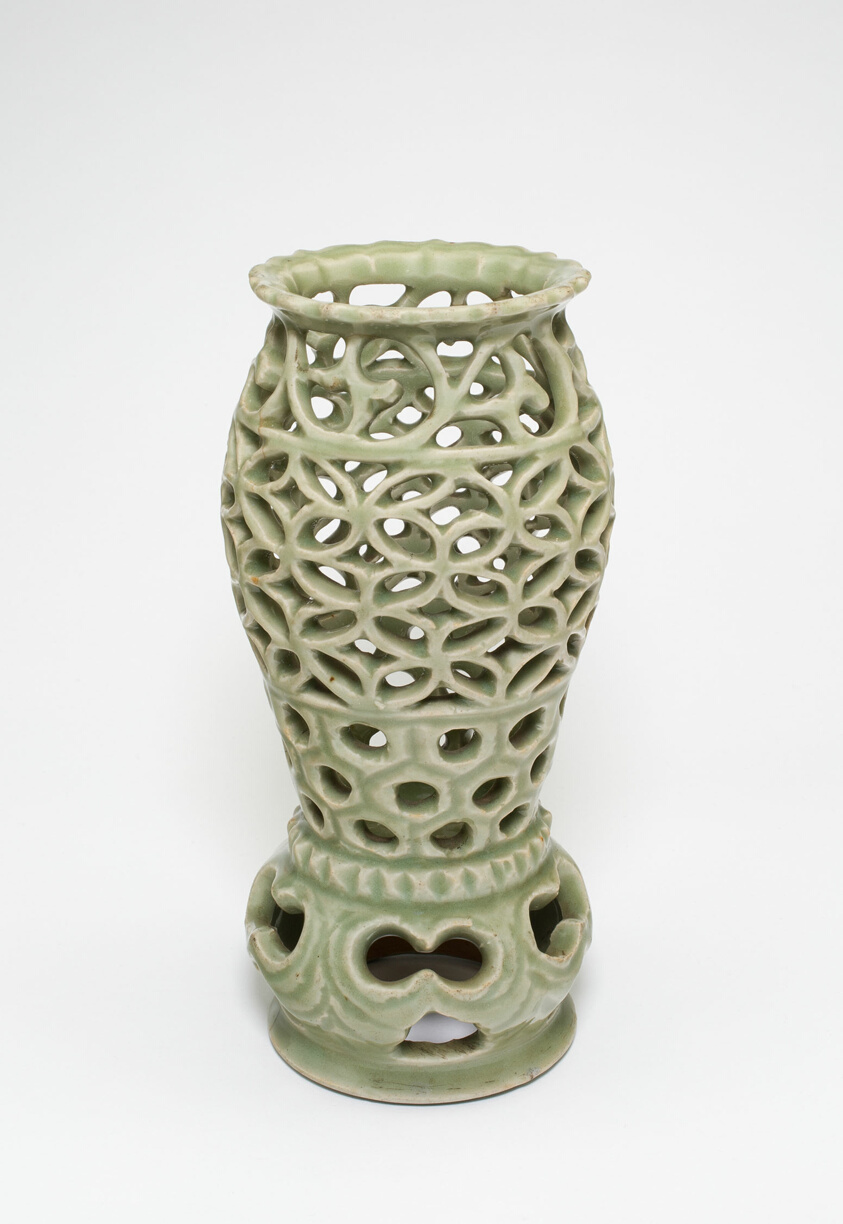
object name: Sculpture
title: Openwork Braizer or Incense Stick Holder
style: Chinese (culture or style)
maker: China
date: Ming dynasty (1368–1644), late 14th/15th century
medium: Longquan ware; celadon-glazed stoneware with carved decoration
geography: China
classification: ceramics; asian art; sculpture